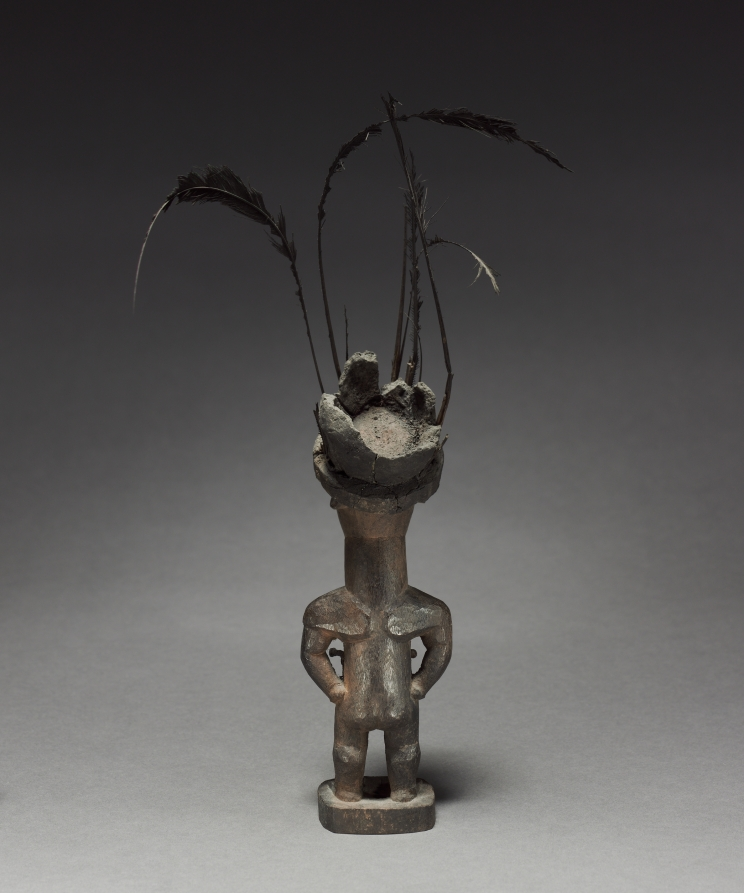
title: Power figure (nkisi)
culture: Africa, Central Africa, Republic of the Congo, Kongo-style maker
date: late 1800s–early 1900s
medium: Wood, feathers, organic material (including resin), iron, and possibly porcelain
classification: Sculpture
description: This figure had lost its nkisi load on the belly, but now shows how the mixture of earth, resin, leaves, glass, and other items was fixed onto the wooden figure, supported by four nails. It had been the property of “the sorcerer of Mboukou.”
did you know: This niksi figurine shows how the mixture of earth, resin, leaves, glass, and other items was fixed. It had been the property of “the sorcerer of Mboukou.”